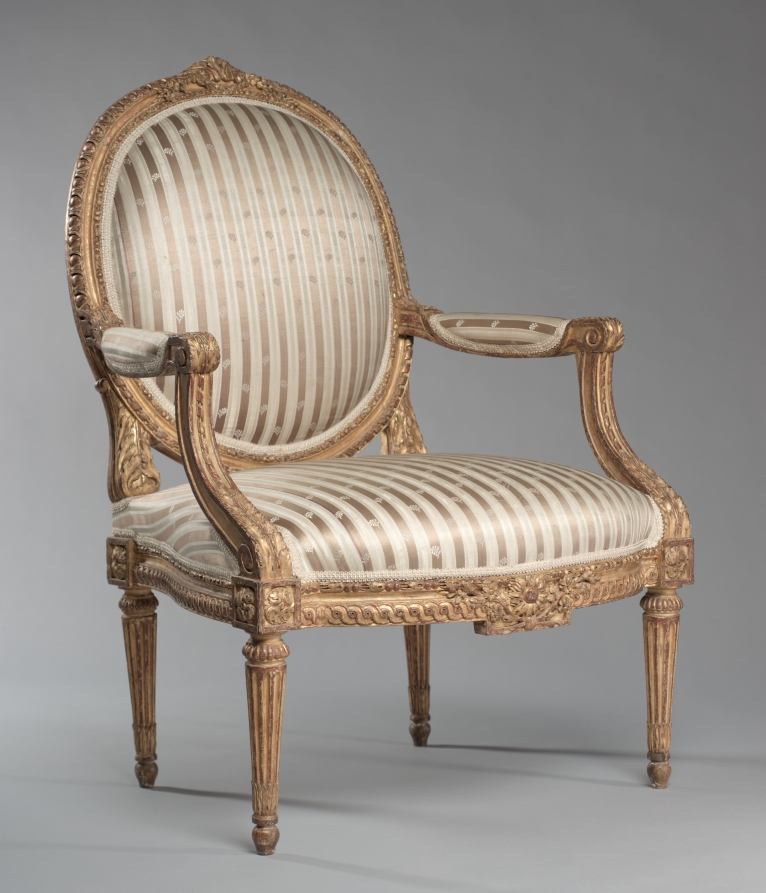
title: Armchair (Fauteuil) (2 of 2)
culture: France, 18th century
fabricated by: Jean-Baptiste II Tilliard (French, 1797)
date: c. 1765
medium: carved and gilded wood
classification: Furniture and woodwork